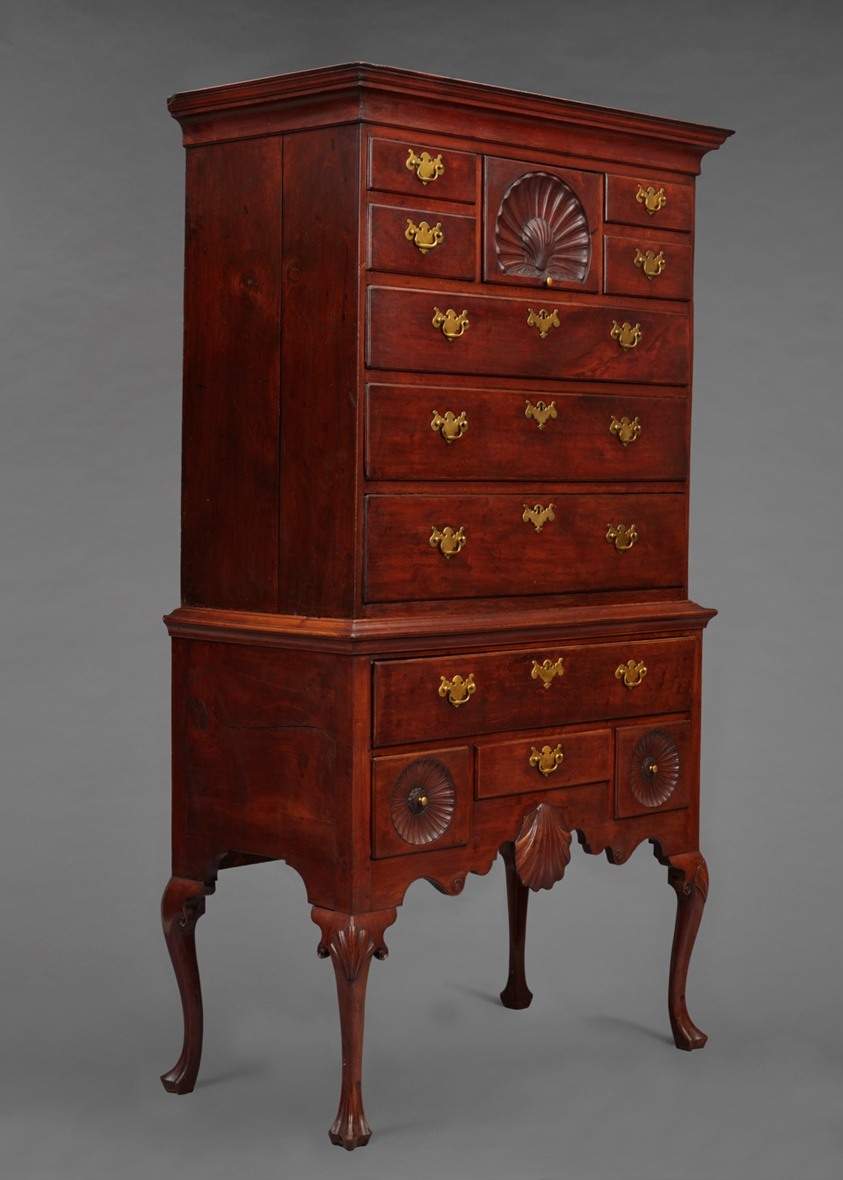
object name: Furniture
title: High Chest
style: queen anne, 18th Century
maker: Artist unknown (American, 18th century); Pennsylvania or New Jersey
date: 1740–60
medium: Cherry and brass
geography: United States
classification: american decorative arts; american arts; furniture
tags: clam shell, scalloping